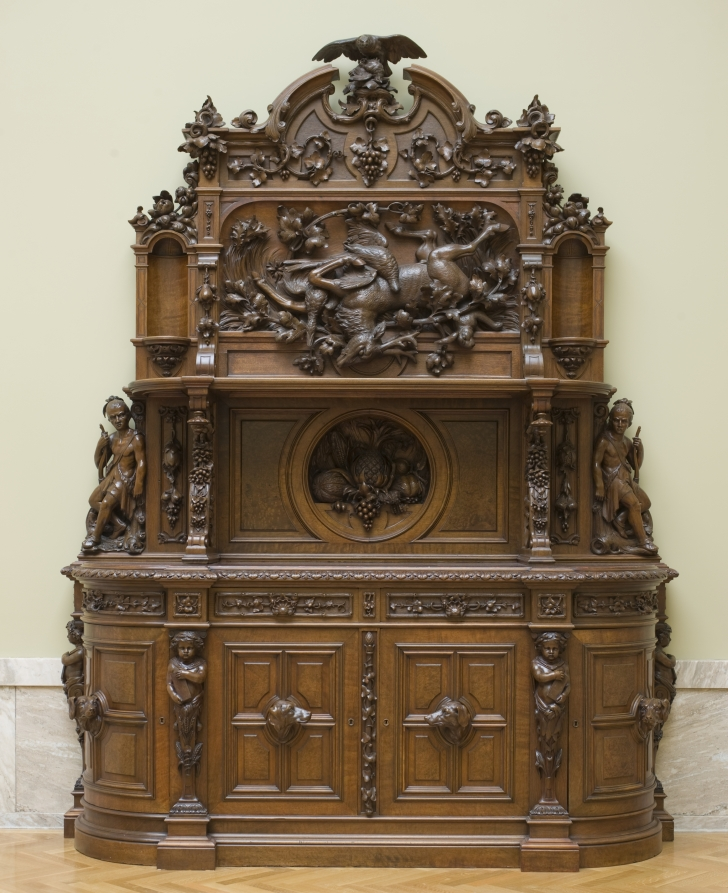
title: Sideboard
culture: America, Pennsylvania, Philadelphia?, 19th century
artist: attributed to Joseph Alexis Bailly (American, 1825–1883)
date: c. 1855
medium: walnut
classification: Furniture and woodwork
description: Newly acquired wealth from railroad production, manufacturing, and an expanded economy produced a new elite class of Americans who looked abroad for sources of decoration to adorn their lives. Grand, baronial furniture, reminiscent of German hunting lodges or French castles, became popular during the mid 1800s among America’s wealthy. Elaborate displays of abundance were reflected in the carvings of flora, fauna, and freshly hunted game. The depictions of Native American hunters on this example, most likely made in Philadelphia, may have meant that this piece was displayed at one of the many international expositions that occurred during this period.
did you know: Luscious fruit, wild animals, and Native American figures are masterfully carved into this walnut sideboard. These decorative adornments were created for a distinctively American taste and would have symbolized abundance and wealth to visitors who encountered it within a grand dining room.